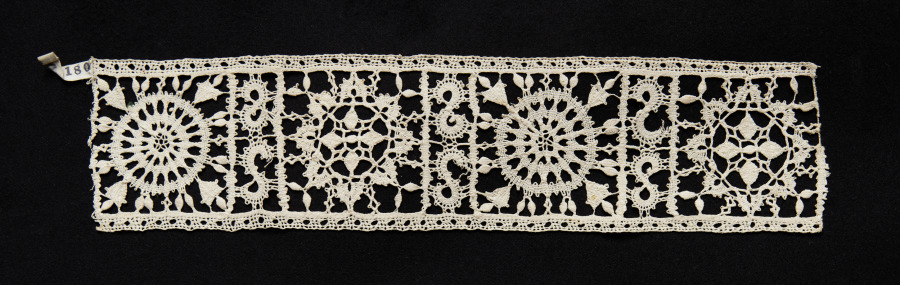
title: Lace Insertion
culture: Italy, Genoa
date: 1550–99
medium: Bobbin lace (needle lace, reticella design)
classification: Lace